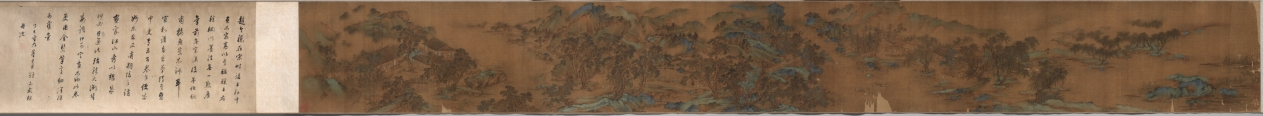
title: Landscape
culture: China, Ming dynasty (1368–1644)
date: 1368– 1644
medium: handscroll; ink and slight color on silk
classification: Painting